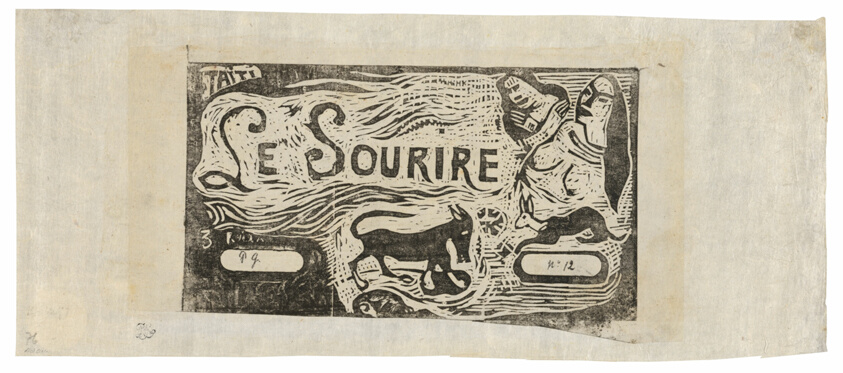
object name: Print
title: Fox, Busts of Two Women, and a Rabbit, headpiece for Le sourire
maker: Paul Gauguin (French, 1848-1903)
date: 1899/1900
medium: Wood-block print in black ink on thin ivory Japanese paper, laid down on ivory Japanese paper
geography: France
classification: woodcut; print; prints and drawing